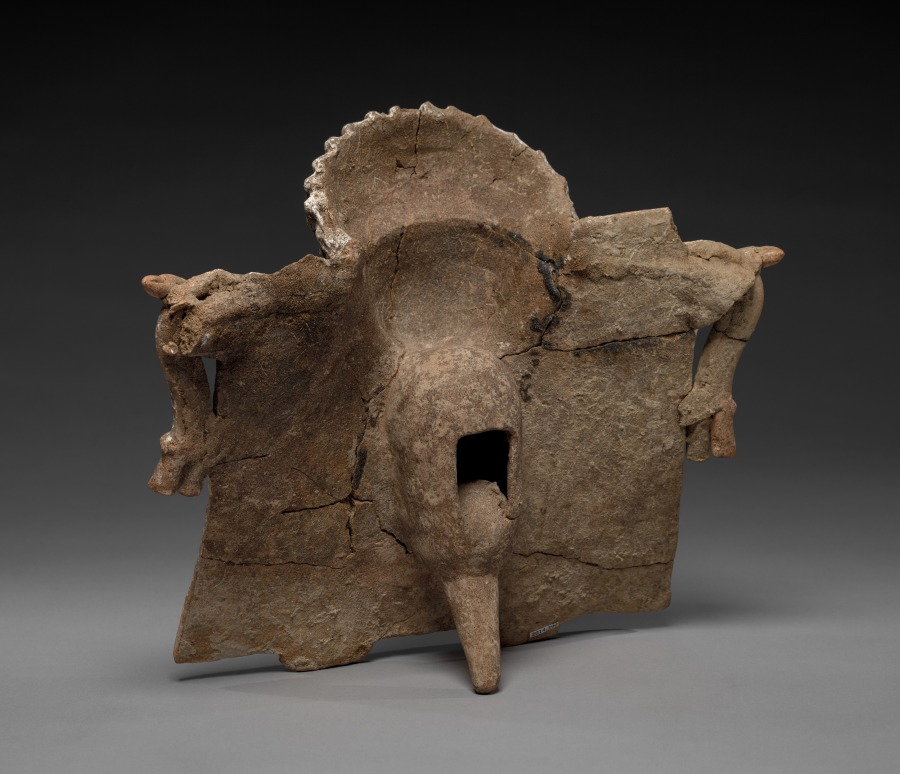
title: Standing Female Figure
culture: Mesoamerica, Veracruz, Nopiloa style?, 7th-10th century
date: 600–1000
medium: ceramic, pigment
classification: Sculpture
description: Ancient Veracruz artists used ceramic to create figural sculptures in a range of sizes, styles, and types. This beautiful, finely wrought female figure is an exceptional example. Although her identity is unknown, her adornments signal high status: ear ornaments, a large necklace, an elaborate dress that drapes over her outstretched arms, and perhaps even her front teeth, filed into a T shape, may have symbolic importance. The unfinished back, with a tripod support, suggests that the figure was meant to be seen from the front.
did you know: This lovely female’s body is a flat plaque supported by a tripod at the rear.